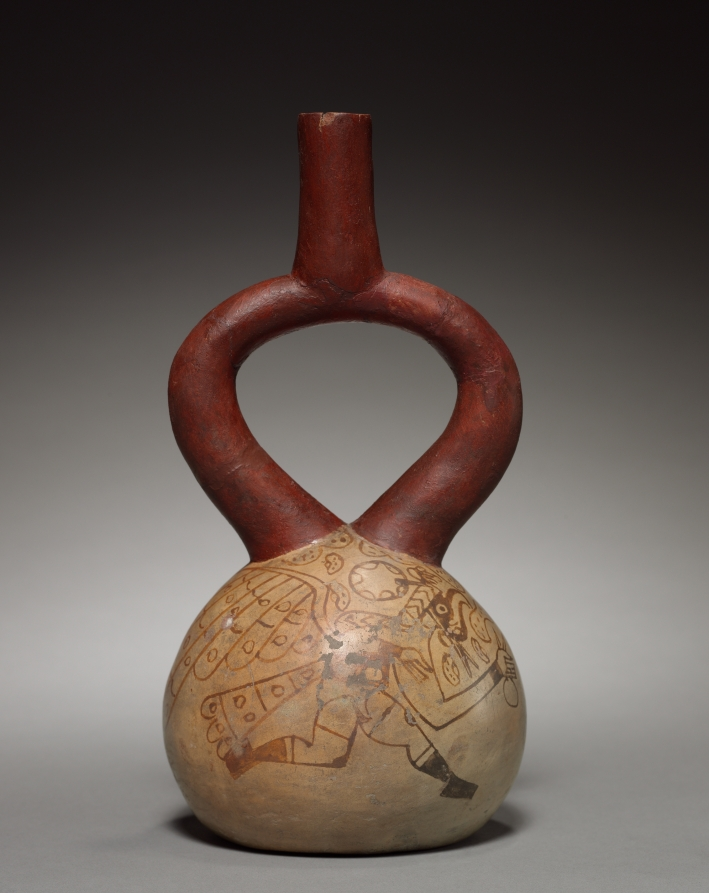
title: Bottle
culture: Peru, Chimú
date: c. 200–400 CE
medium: pottery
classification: Ceramic